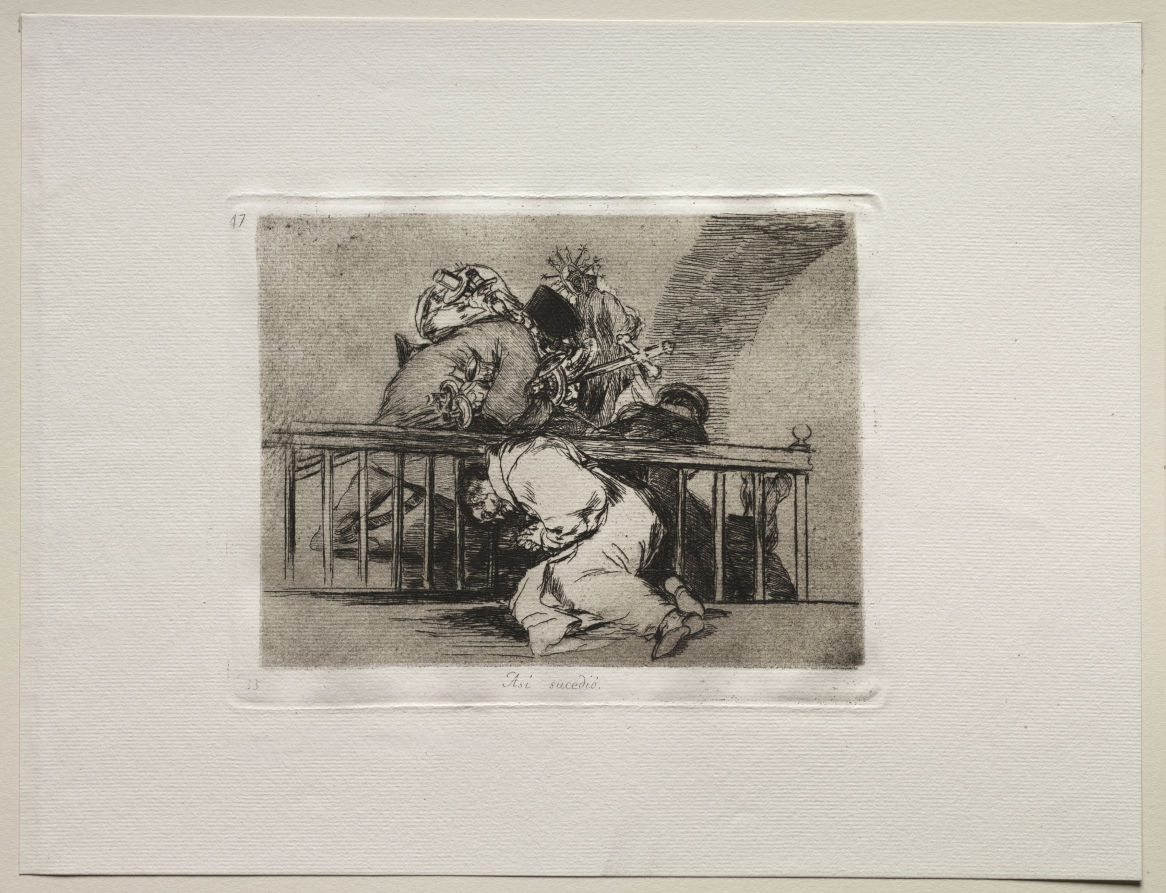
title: The Horrors of War: This is How it Happened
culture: Spain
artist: Francisco de Goya (Spanish, 1746–1828)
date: c. 1810–20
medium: etching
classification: Print